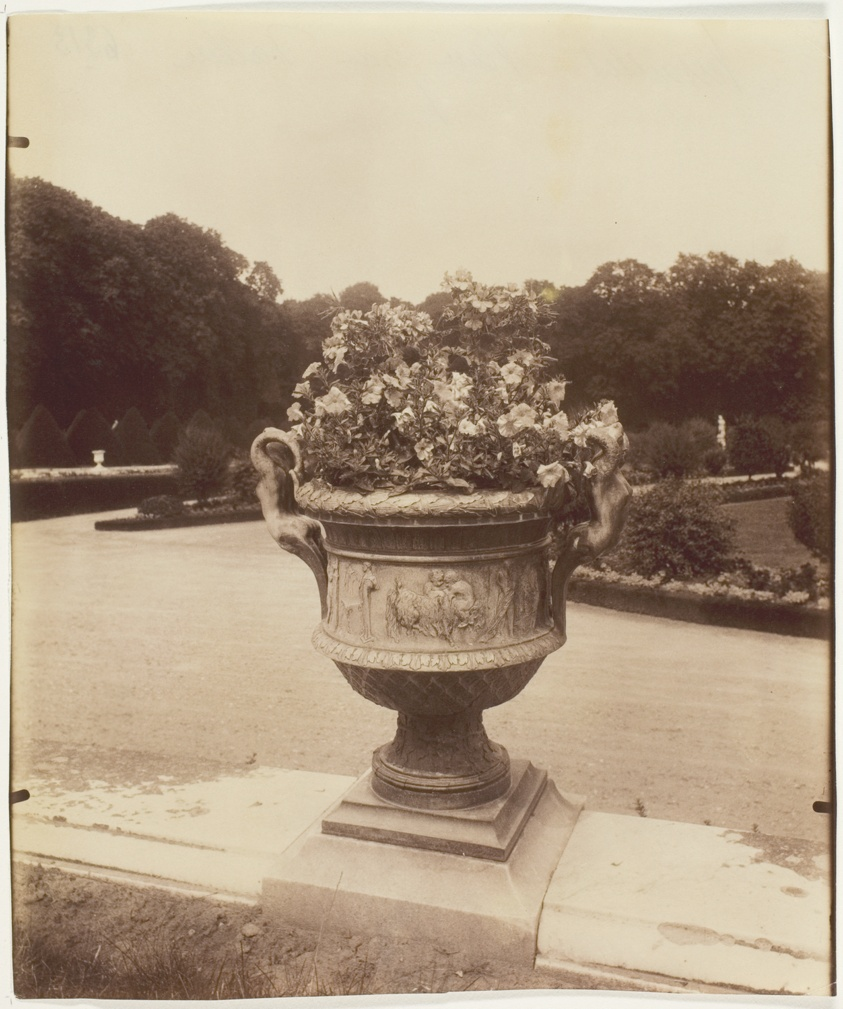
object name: Photograph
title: Versailles, Vase par Ballin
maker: Jean-Eugène-Auguste Atget (French, 1857–1927)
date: 1902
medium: Albumen print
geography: Versailles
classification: albumen silver print; photographic process; photography; photograph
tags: Collected by Hugh Edwards